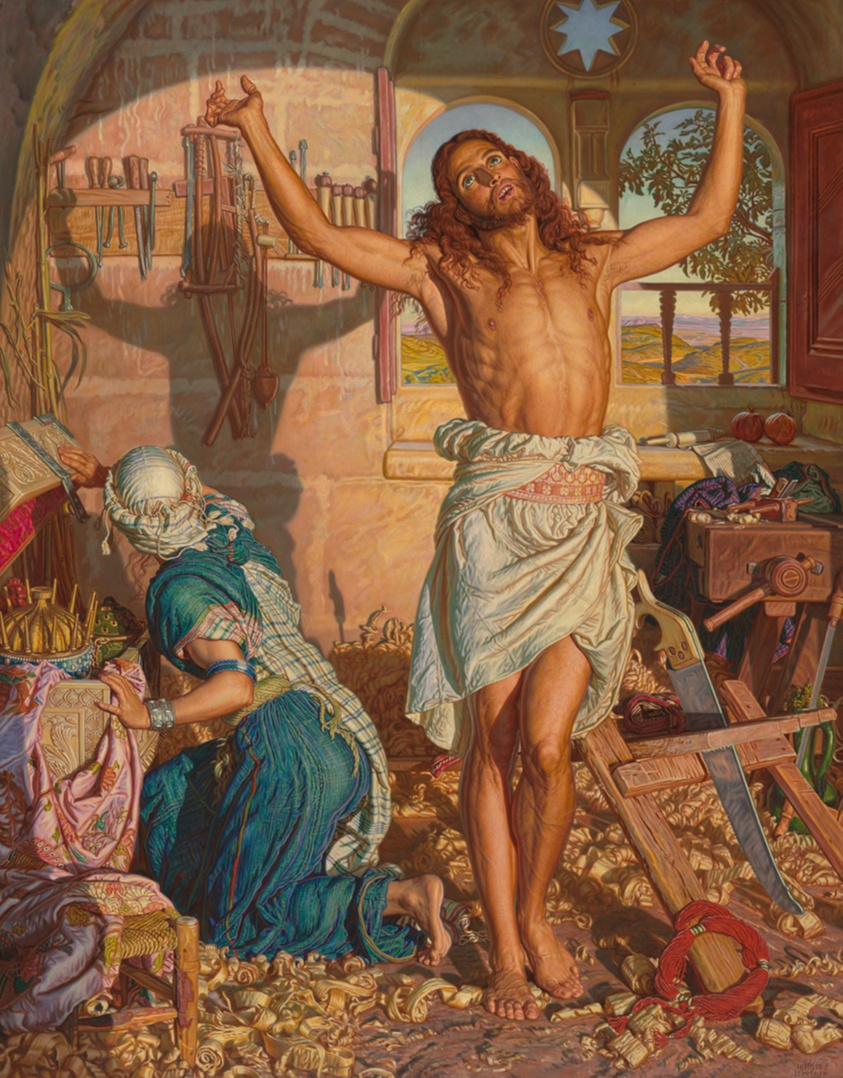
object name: Painting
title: The Shadow of Death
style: 19th century, Pre-Raphaelite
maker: William Holman Hunt (English, 1827-1910)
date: 1873-74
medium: Oil on panel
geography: England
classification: oil on panel; european painting; paint; painting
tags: Christian subjects, religious figures, Christianity, religious, religion